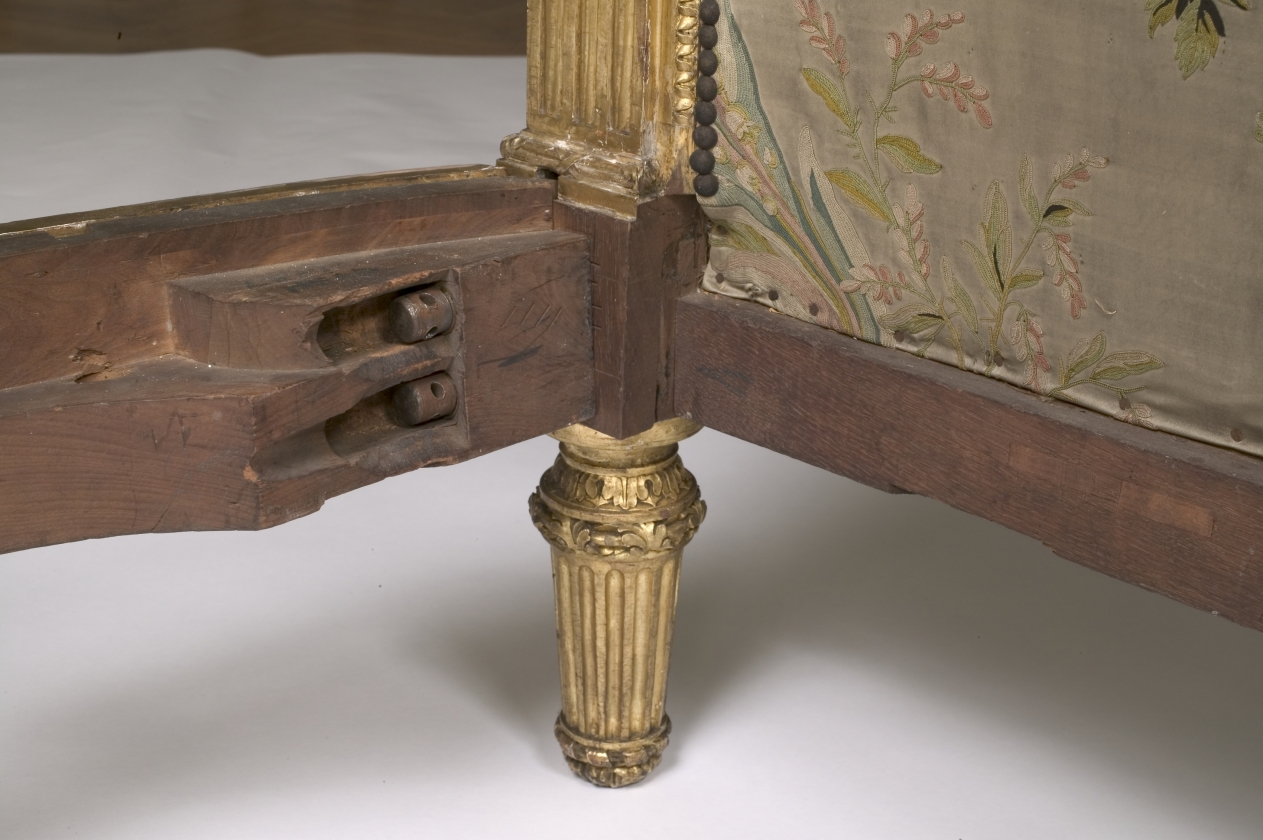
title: Bed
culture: France, 18th century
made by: attributed to Georges Jacob (French, 1739–1814)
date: 1700s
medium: gilded wood and embroidered satin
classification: Furniture and woodwork